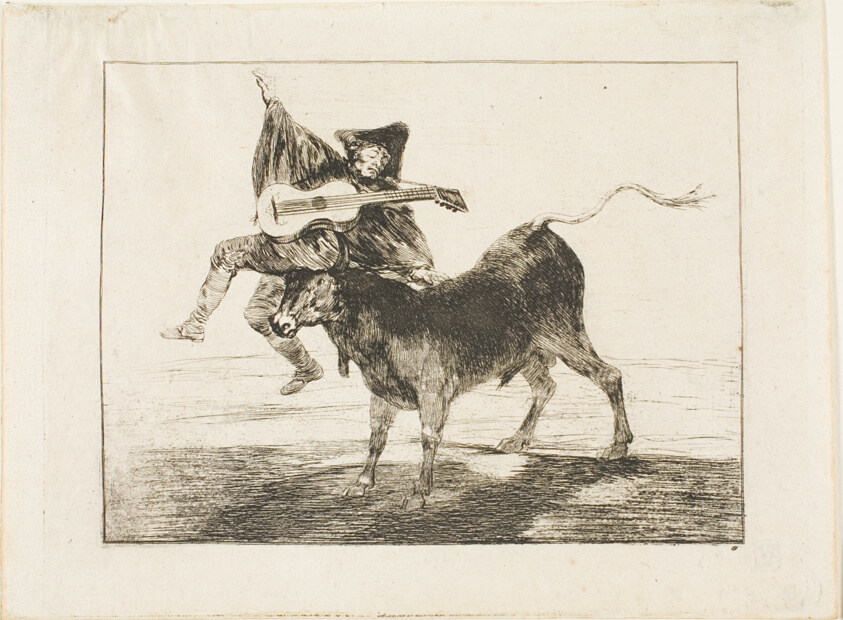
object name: Print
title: May God Repay You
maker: Francisco José de Goya y Lucientes (Spanish, 1746-1828)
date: 1800/04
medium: Etching, aquatint and drypoint on laid paper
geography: Spain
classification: etching; print; prints and drawing